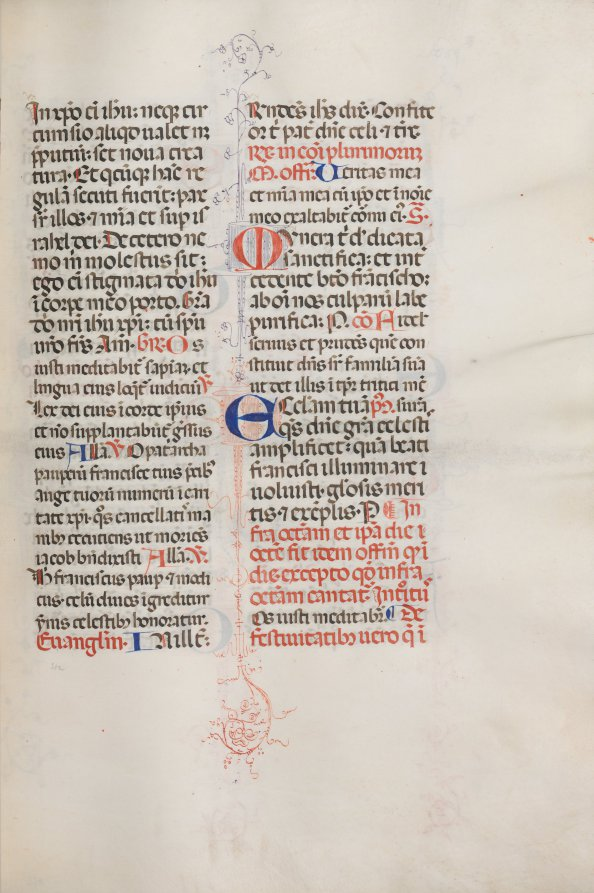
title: Missale: Fol. 319: St. Francis & Full Mass of St. Francis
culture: Italy, Perugia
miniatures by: Bartolommeo Caporali (Italian, c. 1420–1503)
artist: assisted by Giapeco Caporali (Italian, d. 1478)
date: 1469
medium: ink, tempera and burnished gold on vellum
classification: Bound Volume